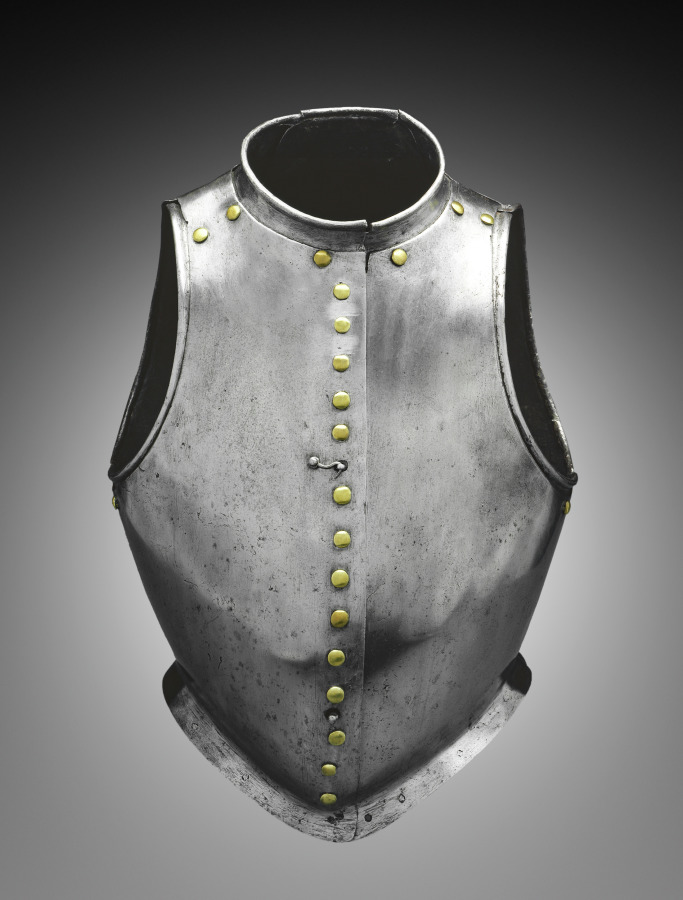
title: "Waistcoat" Cuirass (Combined Breast and Backplates)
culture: North Italy, 16th century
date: c. 1580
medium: Steel; brass rivets simulating buttons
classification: Arms and Armor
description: This cuirass is a specialized type of costume armor. In addition to protecting its owner's torso, it was clearly intended to simulate a civilian jacket, or doublet, with a row of buttons down the front. The owner would have opened it like an ordinary doublet since the two halves are hinged to a narrow backplate.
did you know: While it would provide some protection to the torso, the armor here is very light; fashion not function was the prerequisite.